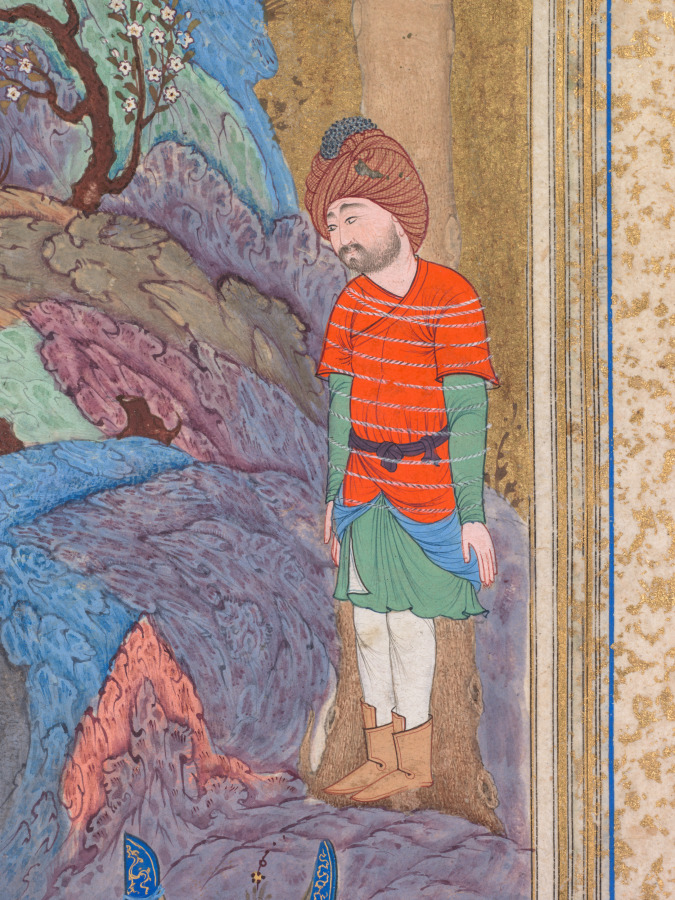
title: Rustam's seventh course: He kills the White Div, folio 124 from a Shah-nama (Book of Kings) of Firdausi (Persian, about 934–1020)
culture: Iran, Tabriz, Safavid period (1501-1722)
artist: attributed to Abd al-Vahhab (Persian, active about 1516)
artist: attributed to Mir Musavvir (Iranian, c. 1510–1555)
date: 1522–37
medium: Gum tempera, ink, gold, and silver on paper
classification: Manuscript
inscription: Script: Nasta'liq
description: The legendary hero Rustam brutally takes the demon chief’s liver blood, needed to cure his king of blindness. Paintings from the Shah-nama made for the Persian ruler Shah Tahmasp (reigned 1524–76) were acclaimed in their day for their brilliant coloring and refinement. Seven of the artists who contributed to this book moved to India to lead the new Mughal painting workshop in the 1550s. They introduced to the Indian artists a more complex color sensibility and preference for presenting faces in three-quarter view, as opposed to in profile.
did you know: Devils in the details: three peer into the White Div’s lair by the Caspian Sea.